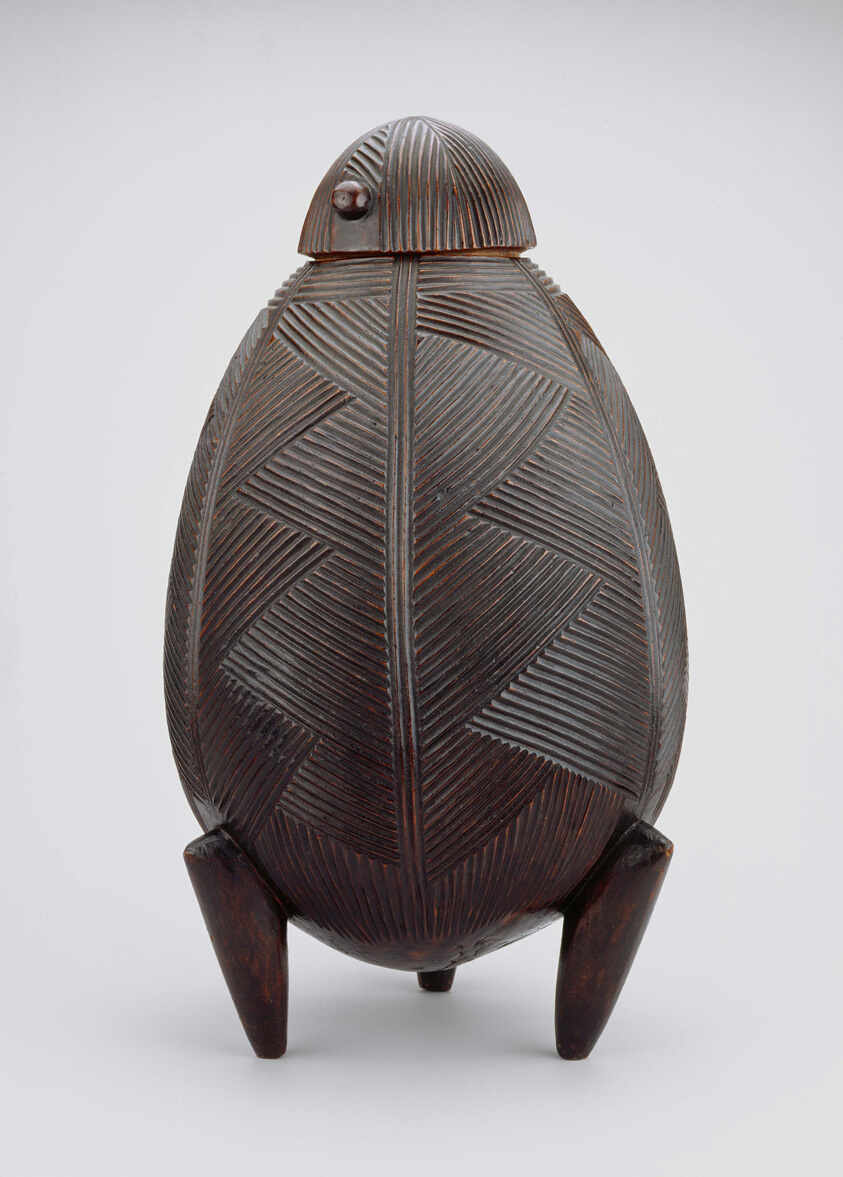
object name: Vessel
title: Lidded Container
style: nguni, Arts of Africa, african Art, south african, Eastern and Southern Africa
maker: Attributed to Unobhadule (active mid- to late 19th century); Northern Nguni; KwaZulu-Natal, South Africa; Eastern and Southern Africa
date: Mid–late 19th century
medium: Wood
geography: South Africa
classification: container; wood; arts of Africa; african art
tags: containers, ceremony, prestige, storage